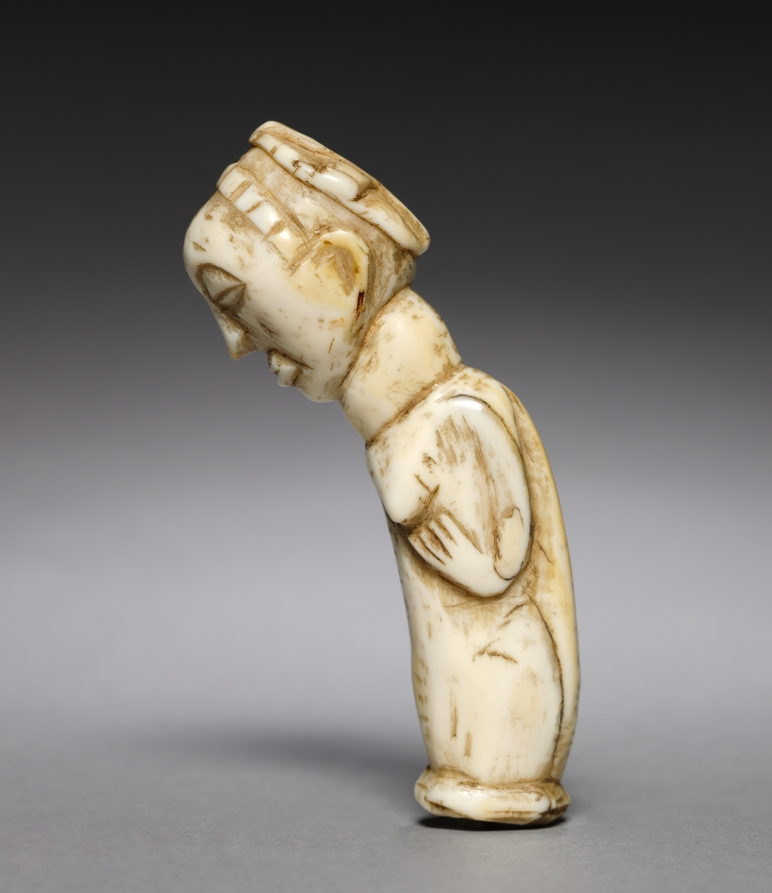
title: Figure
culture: Central Africa, Democratic Republic of the Congo, Luba, 20th century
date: 1900s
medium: ivory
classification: Sculpture